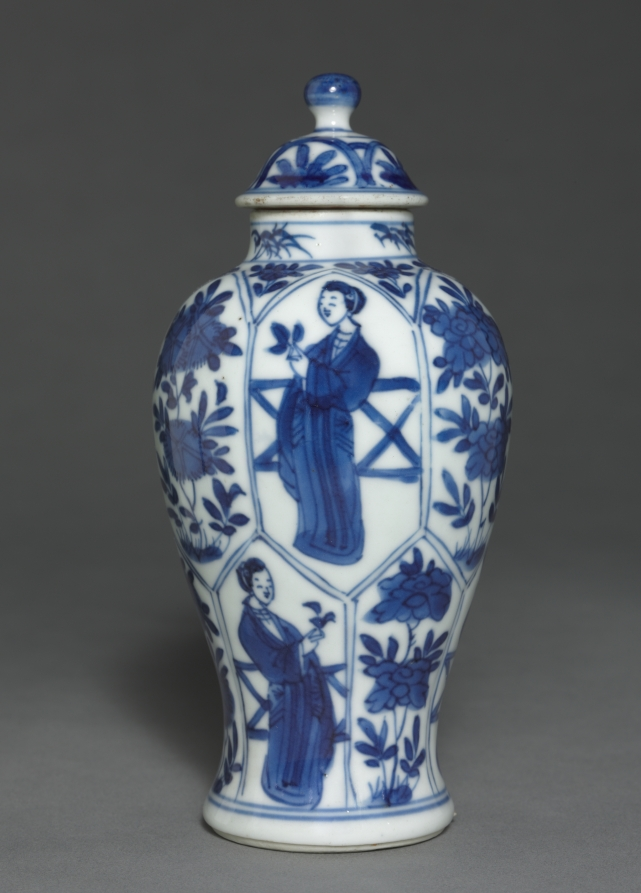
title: Jar with Cover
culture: China, Qing dynasty (1644-1911)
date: 19th Century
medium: porcelain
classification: Ceramic